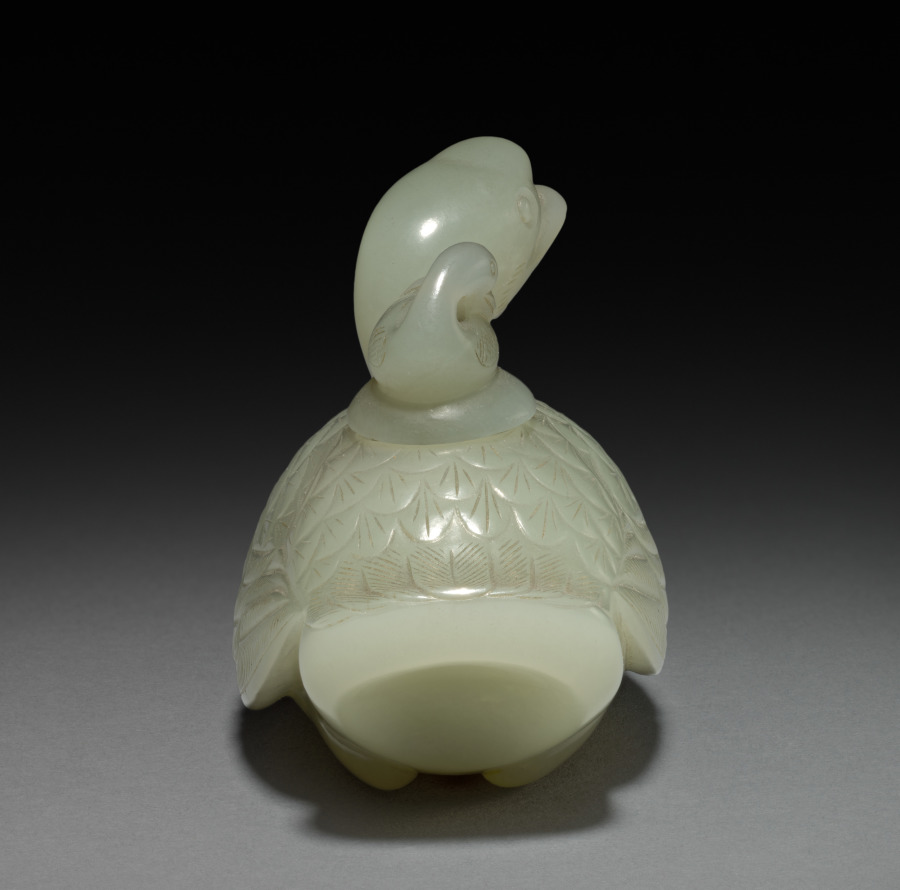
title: Goose and Goslings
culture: China, Qing dynasty (1644-1911)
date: 1700s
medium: jade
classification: Jade